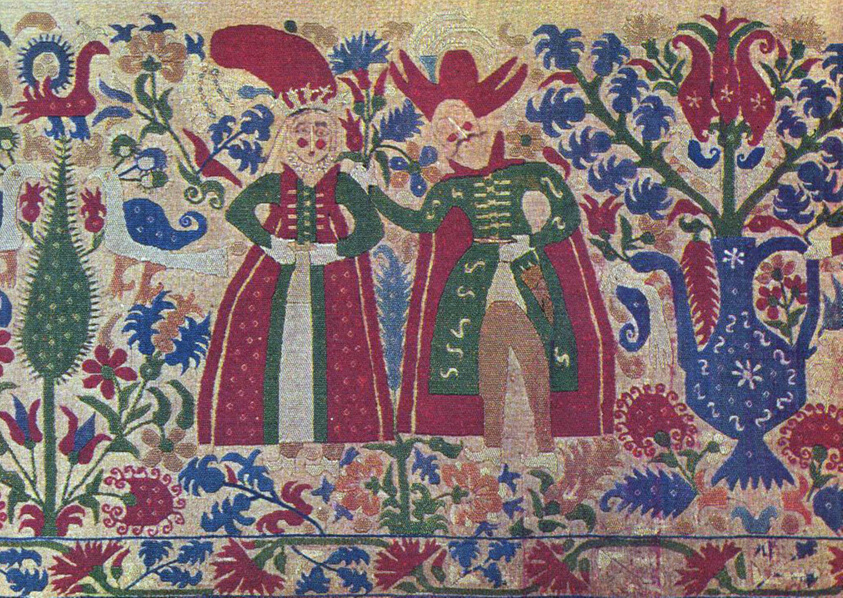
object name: Textile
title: Bedcover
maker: Greece, Epirus Province, Ionian Islands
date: 1700/1900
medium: Linen, plain weave; embroidered with silk in chain, running (pattern darning), satin, and stem stitches; joined with linen, bobbin straight lace tape; four loom widths joined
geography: Greece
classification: textile; needlework (visual works)